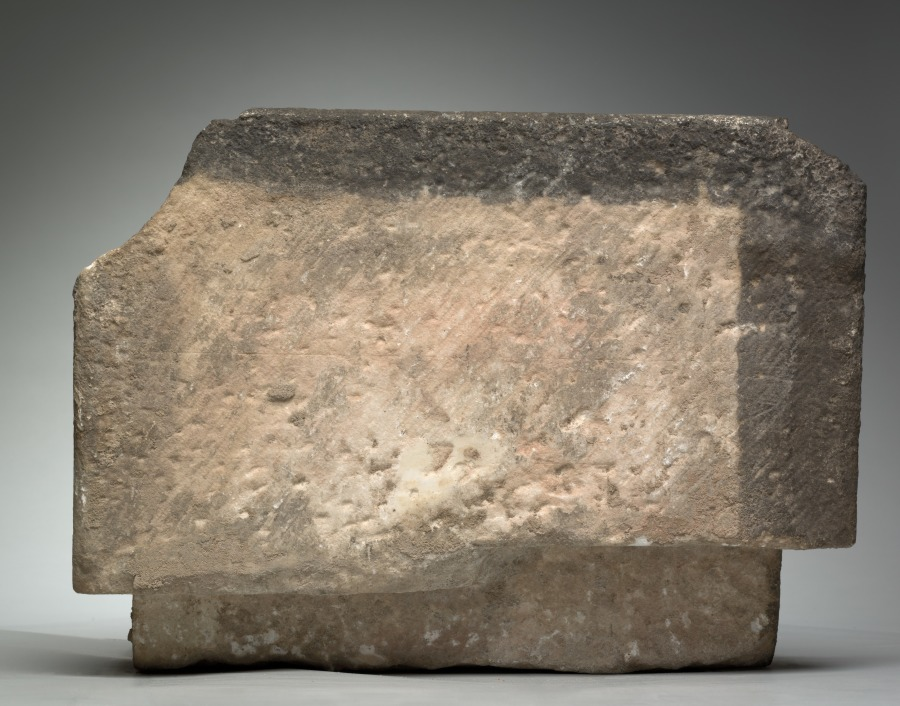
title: Engaged Capital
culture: Southern France, Abbey of Larreule, near Tarbes, 15th century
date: 1400s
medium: limestone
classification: Sculpture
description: This capital belongs to a surviving group including other architectural fragments that once decorated the cloister of the Abbey of Larreule. A cloister was a covered walkway or arcade, usually around all four sides of a square area of grass (the "cloister garth"). The seclusion of the cloister was the monks’ exclusive domain, off limits to others. Here, the monks were supposed to pray, study, meditate, and exercise in privacy and solitude. Such cloister capitals served both to instruct the monks and as a focus for their devotions. Other capitals in this series are installed in the Jardin Massey at Tarbes, near the original abbey. An arch from Larreule has been assembled with other associated French capitals at The Cloisters in New York.